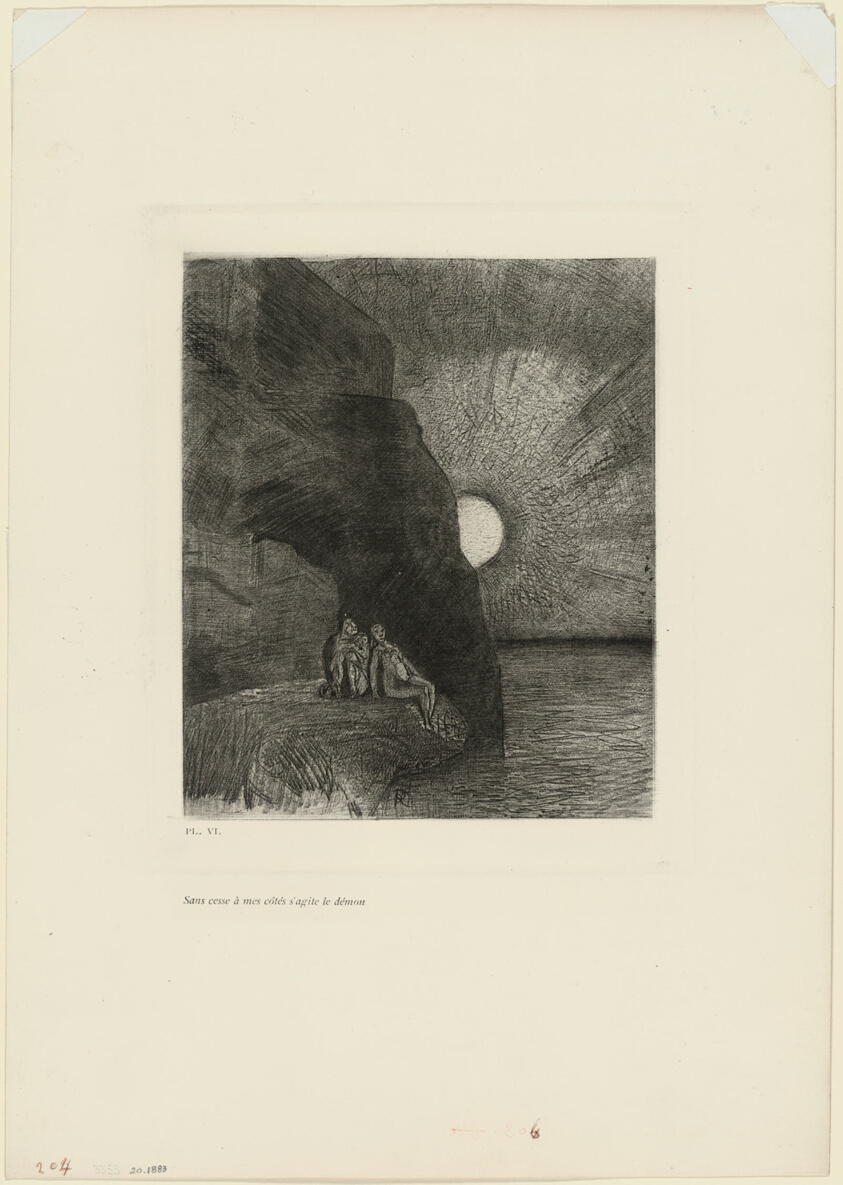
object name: Print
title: Ceaselessly by my side the demon stirs, plate 7 from Charles Baudelaire's Flowers of Evil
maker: Odilon Redon (French, 1840-1916)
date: 1890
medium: Photogravure made from an original drawing (Evely process), in black on ivory wove paper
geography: France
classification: photogravure; reproduction; prints and drawing; print; paper